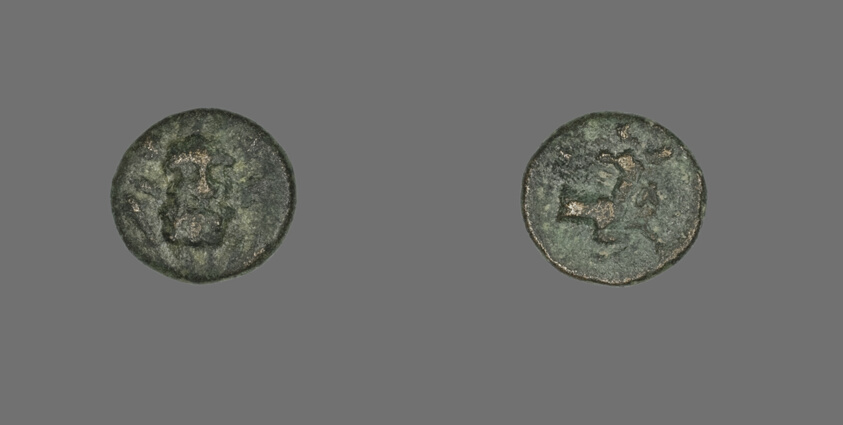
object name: Coin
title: Coin Depicting the Hero Herakles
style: greek, ancient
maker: Greek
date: 2nd-1st century BCE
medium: Bronze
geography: Ancient Greece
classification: coin; ancient art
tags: Heracles, gods (deities)